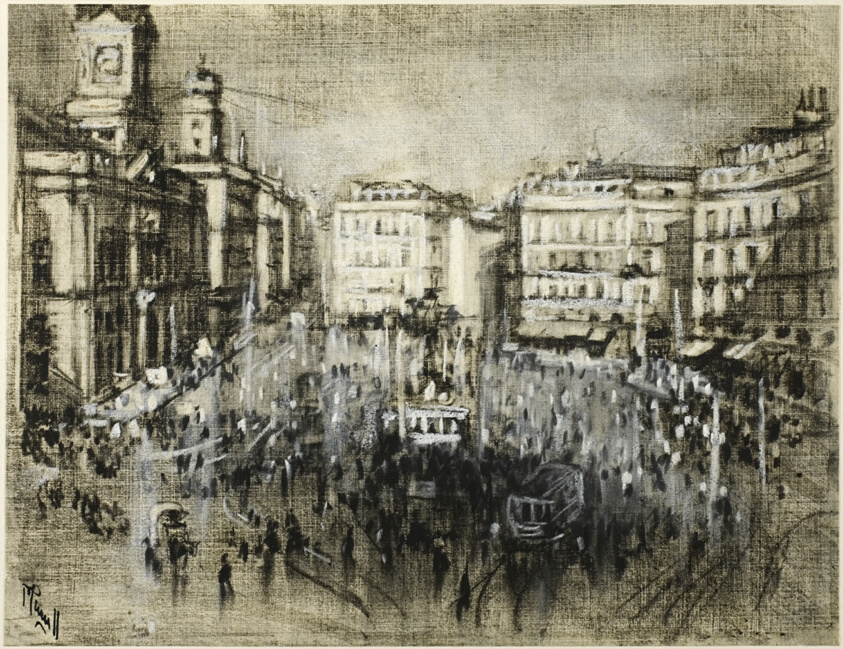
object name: Drawing and Watercolor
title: The Puerta del Sol, Madrid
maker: Joseph Pennell (American, 1857-1926)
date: c. 1903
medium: Oiled charcoal and white chalk, with stumping and erasing, on cream wove paper, perimeter mounted on off-white wood pulp laminate board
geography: United States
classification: charcoal; drawings (visual works); prints and drawing